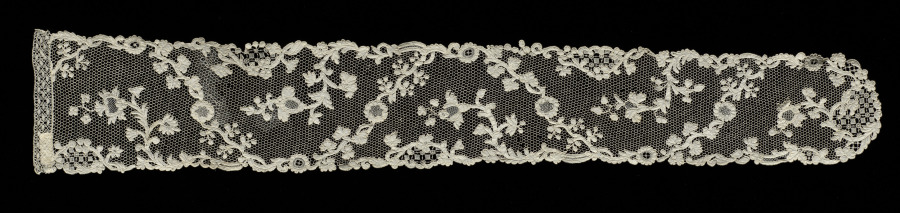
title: Lace Lappet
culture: France, Argentan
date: 1715–74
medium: Linen: needle lace (Point de Argentan)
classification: Lace